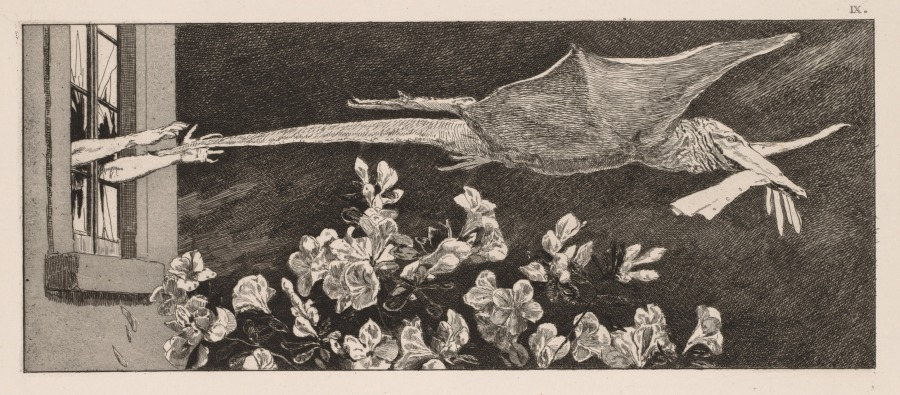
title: A Glove: The Abduction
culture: Germany, 19th century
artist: Max Klinger (German, 1857–1920)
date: 1880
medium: etching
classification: Print